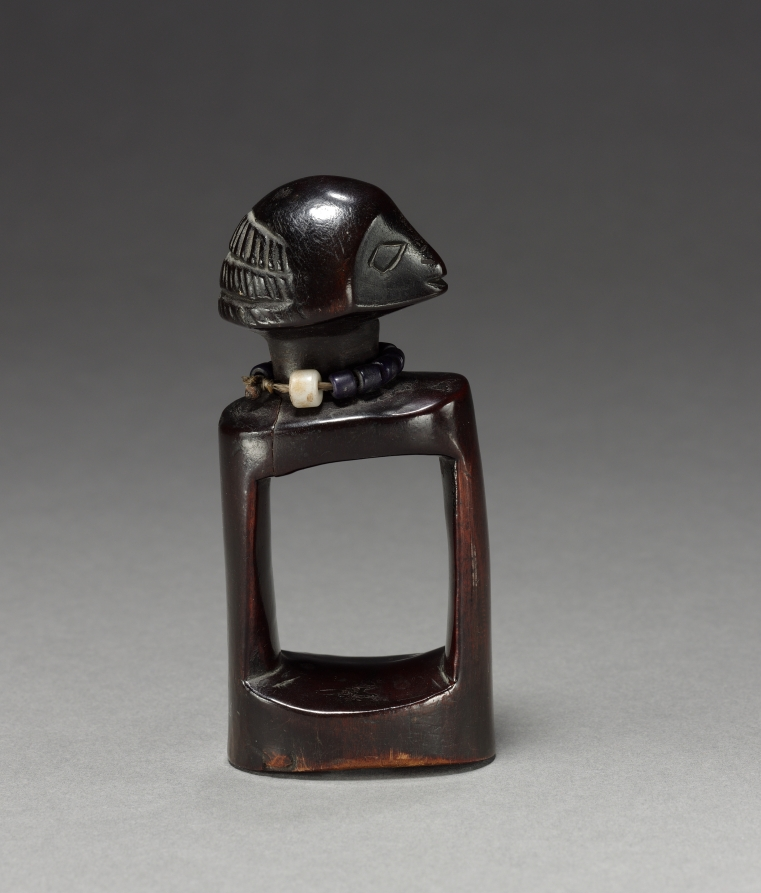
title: Divination Implement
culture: Africa, Central Africa, Democratic Republic of Congo, Luba-style maker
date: late 1800s–early 1900s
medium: Wood, glass beads, and natural fiber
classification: Sculpture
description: This device helped contact an ancestral spirit who clarified misfortunes. The diviner awakened the ancestor by anointing the rectangular frame of the figurine with pungent basil leaves. Sitting on a textured woven mat, the diviner held one side of the instrument while the client held the other. The diviner then posed questions to the ancestor who responded through certain movement signaling affirmation.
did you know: This divination implement is a kakishi (embodiment of an ancestor) device that connects the diviner and the client to the spirit they wish to contact.